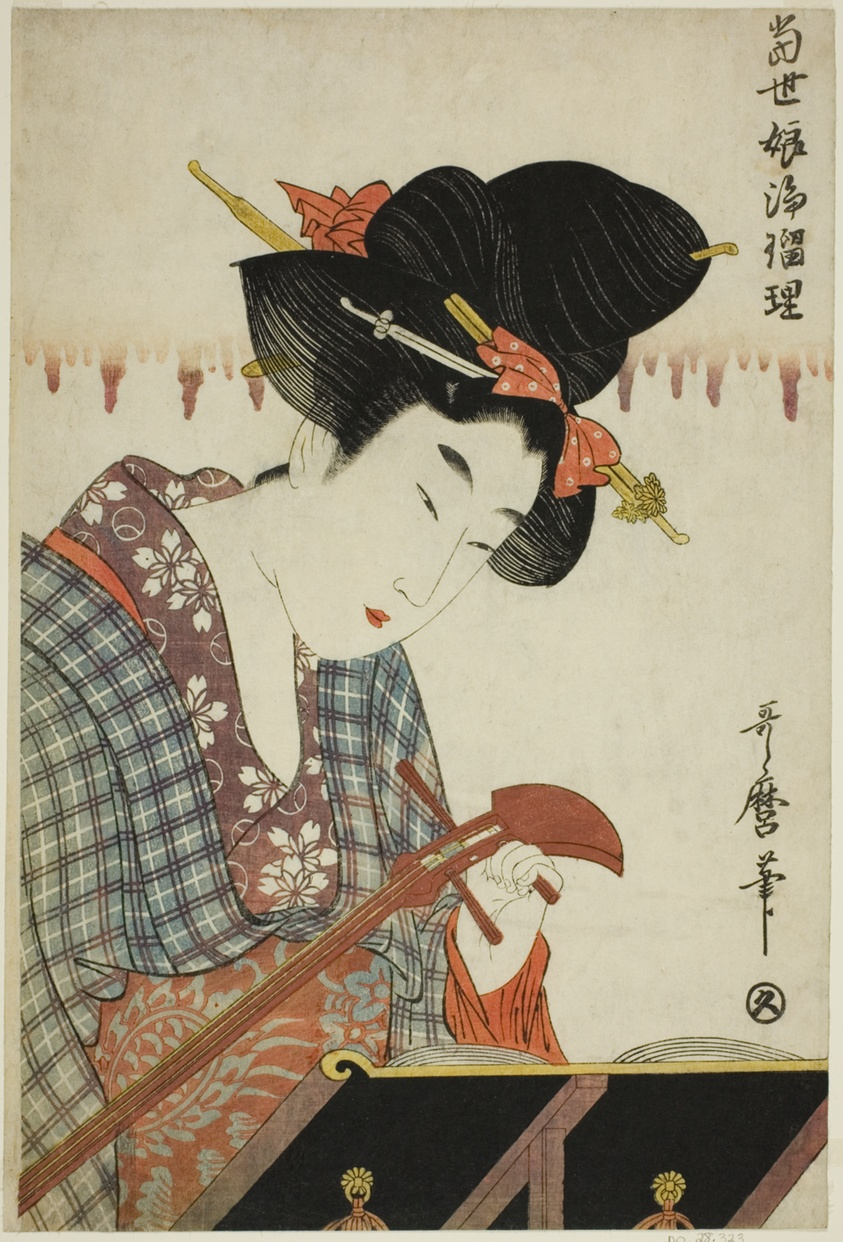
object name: Print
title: Turning a Shamisen (Shamisen no nejime), from the series "Chanting to Shamisen by Young Women of Today (Tosei musume joruri)"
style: Japanese (culture or style)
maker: Kitagawa Utamaro 喜多川 歌麿; Japanese, 1753 (?)-1806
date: c. 1804/06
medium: Color woodblock print; oban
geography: Japan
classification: woodblock print; print; asian art